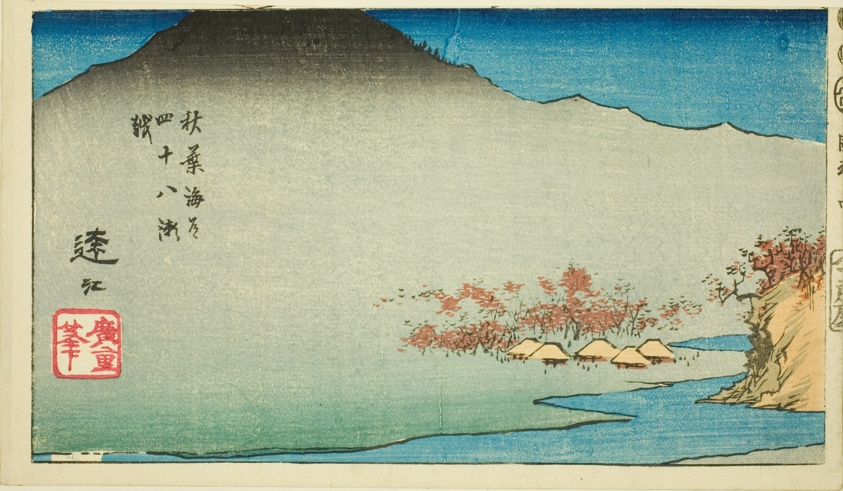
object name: Print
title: Crossing the Forty-eight Rapids on Akiba Road in Totomi Province (Akiba kaido shijuhachi segoshi, Totomi), section of sheet no. 4 from the series "Cutout Pictures of the Provinces (Kunizukushi harimaze zue)"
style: Japanese (culture or style)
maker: Utagawa Hiroshige 歌川 広重; Japanese, 1797-1858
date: 1852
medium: Color woodblock print; section of harimaze sheet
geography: Japan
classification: woodblock print; print; asian art